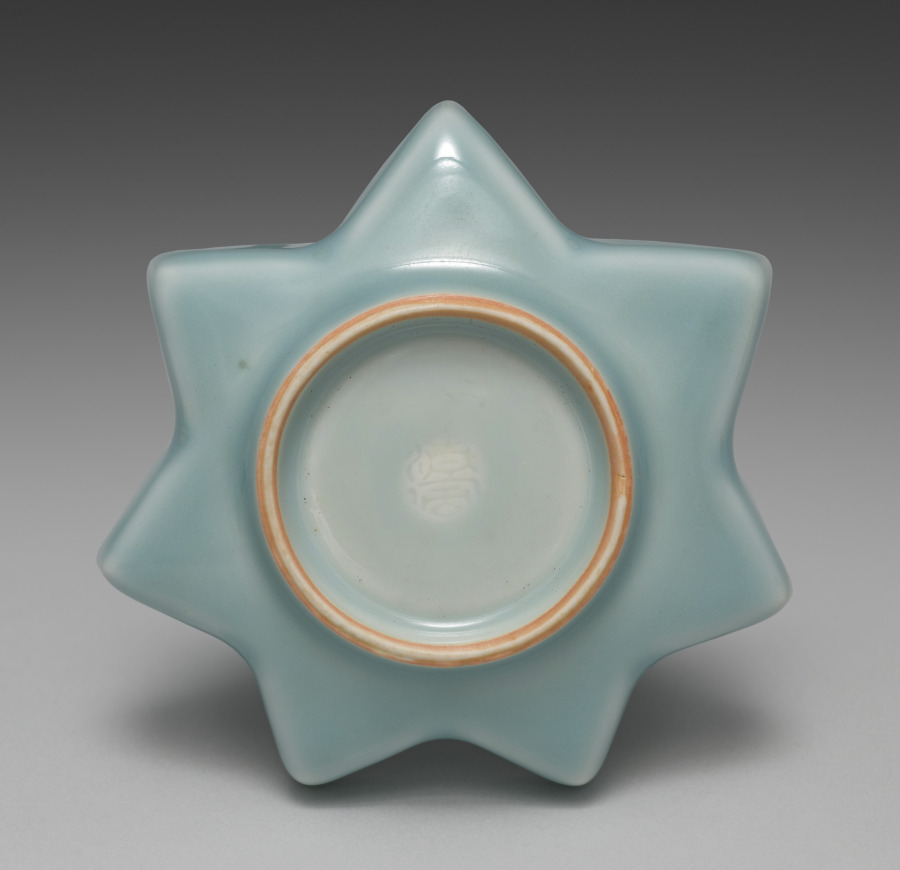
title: Saucer from Maple Leaf-Shaped Saucers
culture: Japan, Meiji period (1868–1912)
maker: Seifū Yohei III (Japanese, 1851–1914)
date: 1893–1914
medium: One of five dishes from a set of ten; porcelain with blue glaze and molded design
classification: Ceramic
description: These maple leaf–shaped saucers, like Yohei III's five shell saucers CMA 2022.188, have a long, horizontal box with a separate compartment for each piece. Now a set of five, these dishes were originally a set of ten, stored in two boxes of five each. From their housings, which accommodate differing numbers of objects, one can hypothesize that while some items created by the Seifu studio were intended to be acquired in larger sets, and thus were perhaps made to order, others, like these, may have been items to be purchased of the shelf in set quantities that allowed clients flexibility in scale. The box for these five saucers describes them as “heavenly blue[–glazed] porcelain” (tenseiji). The veins of the leaves are slightly raised in the clay so that the glaze pools around them and they stand out as white where the glaze thins. There are longer lines at the points of the leaves and shorter ones following the wall of each indentation so that the design has both a horizontal and a subtle vertical dimension.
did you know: These saucers shaped like maple leaves show Seifū Yohei III’s “heavenly blue glaze.”